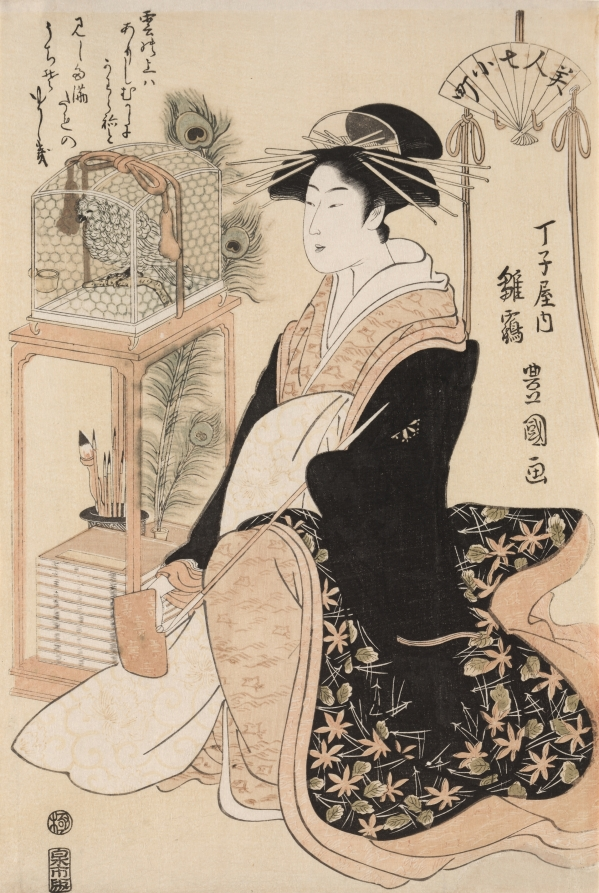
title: Hinazura of Chōjiya from the series Beauties as the Seven Komachi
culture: Japan, Edo period (1615–1868)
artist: Utagawa Toyokuni (Japanese, 1769–1825)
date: c. 1793–97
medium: Color woodblock print; ink and color on paper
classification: Print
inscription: Artist's signature: Toyokuna ga. Publisher: Izumiya Ichibei (Senichi han). Censorship Seal: kiwame.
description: Seven plays based on legends from the life of 9th-century poet Ono no Komachi served as the source for this print series. Hinazura looks at a caged bird, symbolizing the play The Parrot, in which Komachi responds to a poem sent to her by the Emperor Yozei with a poem with just one syllable changed.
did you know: The courtesan seated on the floor holds a tobacco pipe and pouch.